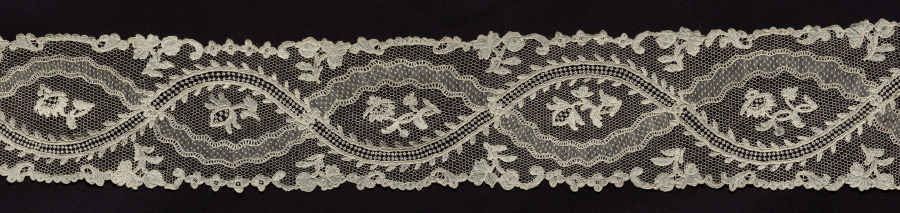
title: Lace Lappet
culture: France, Argentan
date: 1715–74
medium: Linen: needle lace (Point de Argentan)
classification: Lace